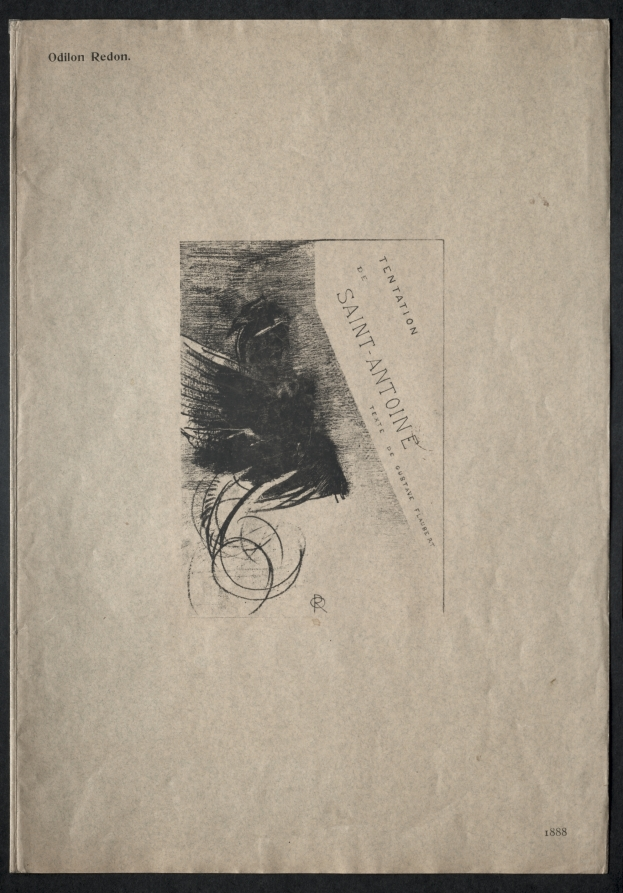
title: Cover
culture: France, 19th century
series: The Temptation of Saint Anthony (First Series)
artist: Odilon Redon (French, 1840–1916)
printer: Becquet (French)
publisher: Edmond Deman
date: 1888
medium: lithograph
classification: Print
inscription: initialed at bottom center of image: OR; printed at upper left: ODILON REDON; diagonally at right of image: TENTATION / DE / SAINT-ANTOINE / TEXTE DE GUSTAVE FLAUBERT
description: This portfolio is one of three made by Odilon Redon inspired by avant-garde writer Gustave Flaubert’s novel The Temptation of Saint Anthony (1874). Captivated by the book’s fantastical account of moralizing tests encountered by a hermit in the desert, Redon executed charcoal drawings and attempted to evoke that medium’s dense blackness in his lithographs. Based on the text’s darkly imaginative tone rather than its actual content, the works in this series present invented monsters and figures in otherworldly settings with jarring tonal variations. Although Redon felt that the prints effectively translated the surreal universe of his source material, they were largely misunderstood in his own time.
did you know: Publisher Edmond Deman commissioned this portfolio after he saw an 1886 exhibition of Redon's work in Brussels, Belgium.